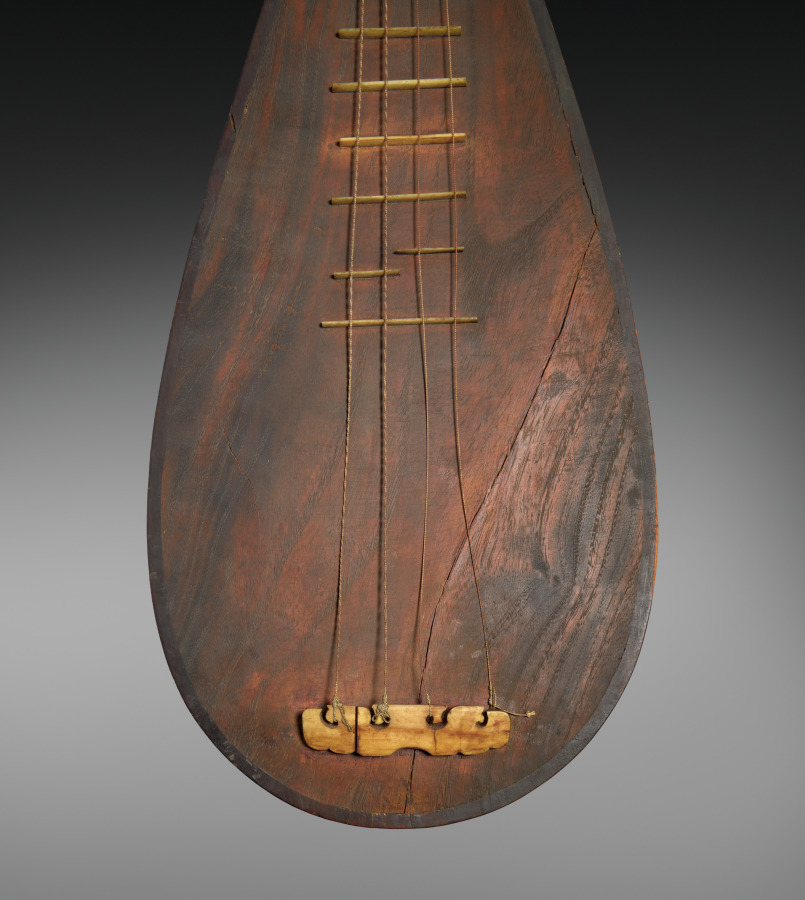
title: Pipa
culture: China, Qing dynasty (1644-1911)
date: 1800s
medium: Wood, ivory, bone, gut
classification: Musical Instrument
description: The term pipa, known since the 3rd century BC, describes the playing motion of the right hand: pi, “to play forward” (left), and pa, “to play backward” (right). A type of lute played with the fingers, it is used in opera and storytelling ensembles and has an impressive, virtuosic solo repertoire. Historic imagery, such as wall paintings, documents the spread of the pipa, along the Silk Road from western and central Asia to China. The bat finial here is a commonly used device on 19th-century Chinese lutes symbolizing good luck.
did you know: The string holder is made of bone.